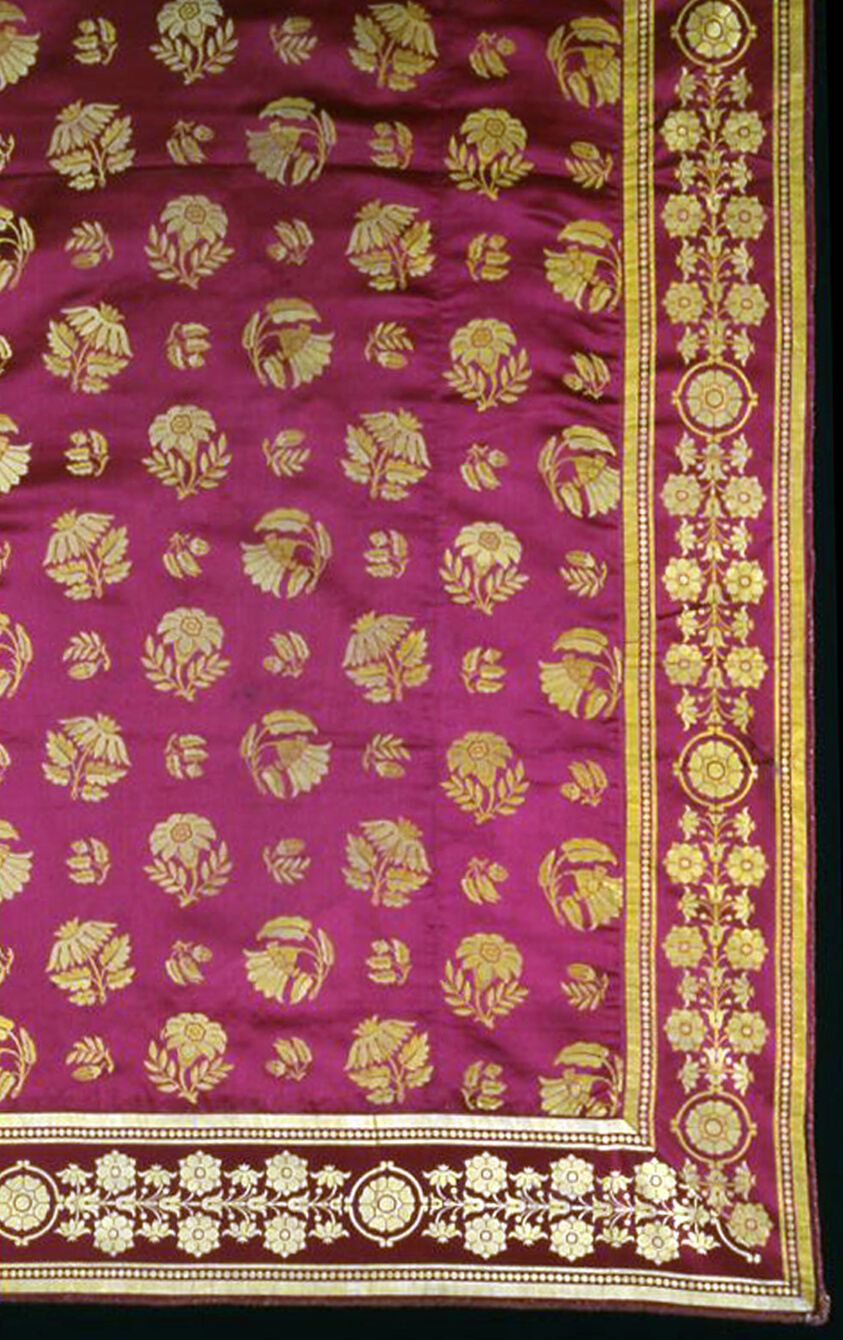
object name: Textile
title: Cover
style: empire, european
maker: France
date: Empire period, 1808/14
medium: Silk, warp-float faced 4:1 satin weave with weft-float faced 3:1 twill interlacings of secondary binding warps and supplementary patterning wefts; edged with silk covered linen cord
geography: France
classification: textile; weaving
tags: flowers